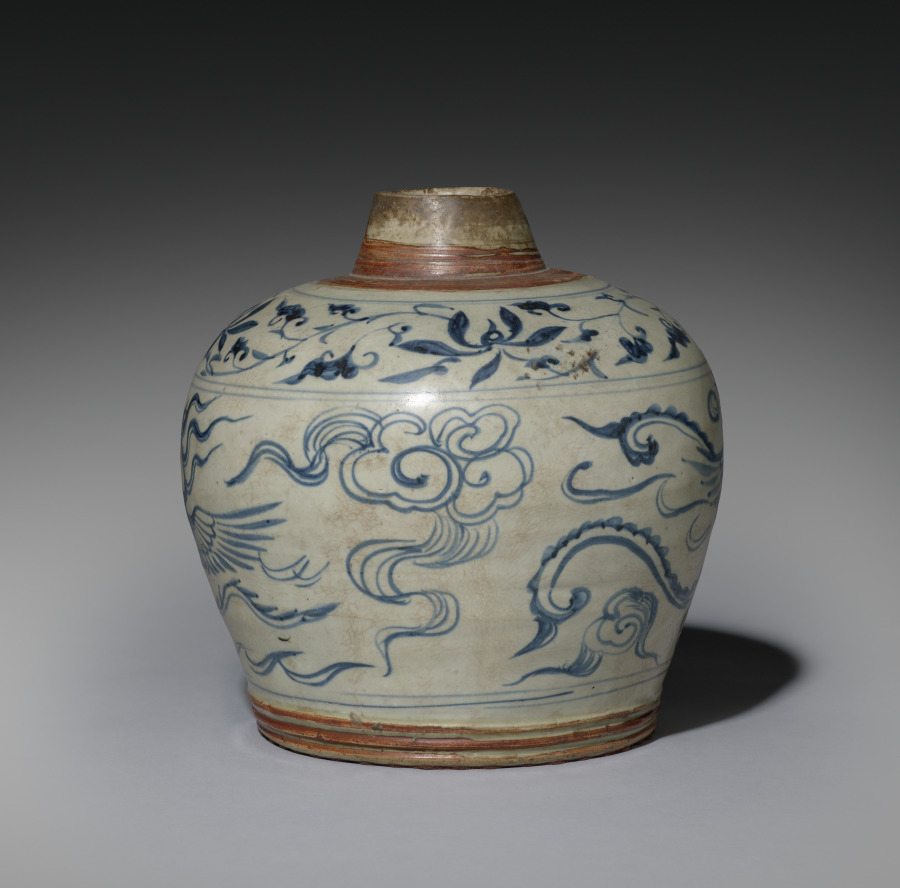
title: Covered Jar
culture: Vietnam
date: 1500s–1600s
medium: stoneware with blue and white decoration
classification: Ceramic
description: This stoneware ginger jar is decorated with a blue and white phoenix among clouds (a symbol of longevity) and floral motifs.